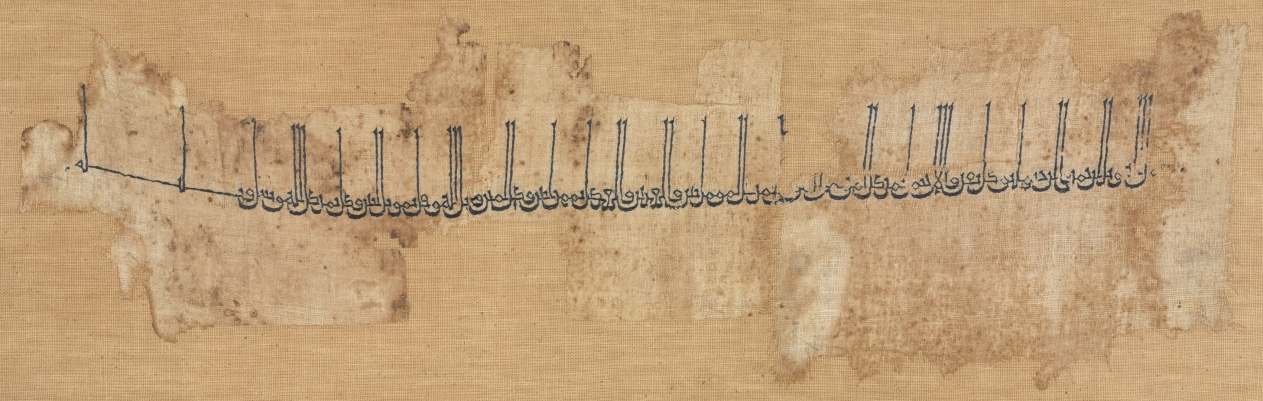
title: Embroidered cotton tiraz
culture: Iraq, Baghdad, Abbasid period, reign of al-Qadir 991–1031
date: 991–1031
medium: plain weave: cotton; embroidery, chain and self-couching stitches: silk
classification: Embroidery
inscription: "In the name of God the Merciful, the Compassionate . . . Year three hundred."